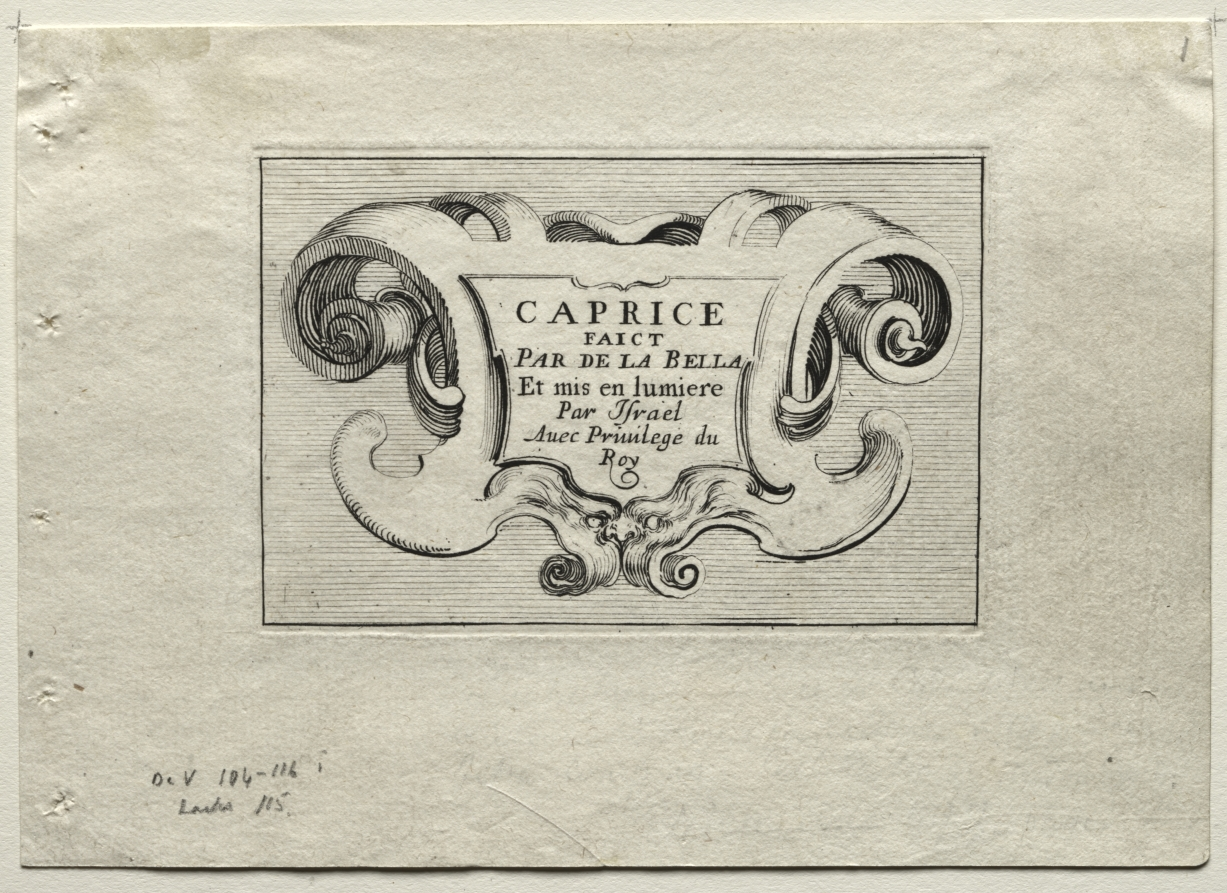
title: Caprices: Title Page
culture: Italy, 17th century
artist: Stefano Della Bella (Italian, 1610–1664)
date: c. 1642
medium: etching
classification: Print